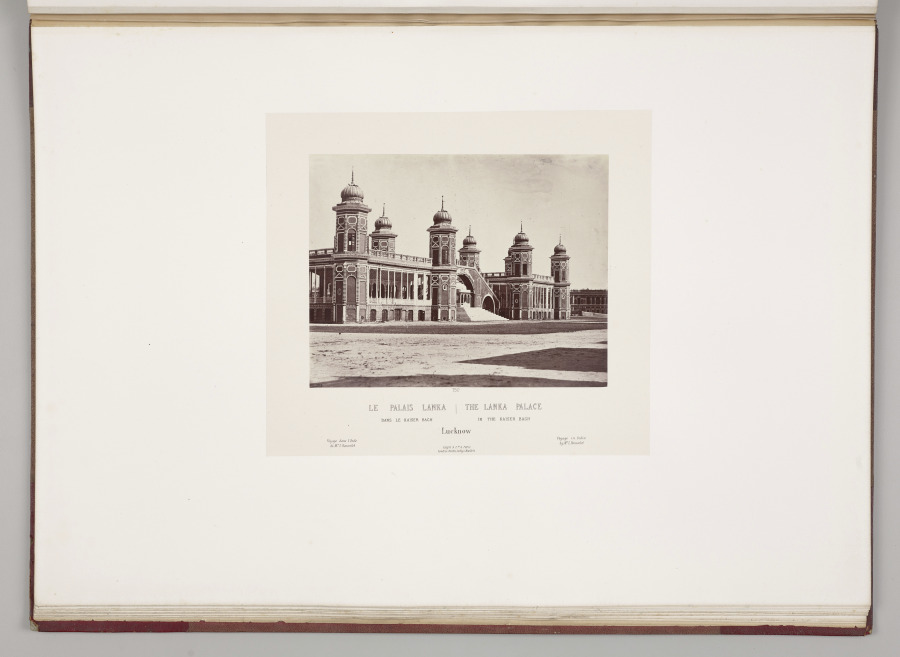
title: The Lanka Palace in the Kaiser Bach, Lucknow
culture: France, 19th century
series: India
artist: Louis-Théophile Marie Rousselet (French, 1845–1929)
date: 1865–68, published 1869–70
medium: Albumen print from glass plate negative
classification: Photograph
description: Concerned that his drawings did not do justice to the splendor of India’s monuments, Rousselet learned photography in India that year, a remarkable accomplishment. He proved to be a talented photographer with a sophisticated sense of composition. The scenes in this volume sweep across sites of Sultanate, Rajput, and Mughal power in northern India, from the sacred Hindu city of Varanasi on the Ganges River to Alwar in Rajasthan. Also included are several scenes of industry and portraits of Indian rulers.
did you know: Louis Rousselet described himself as a “scientific traveler” when he went to India alone at age 18 in 1863 and stayed into 1868.